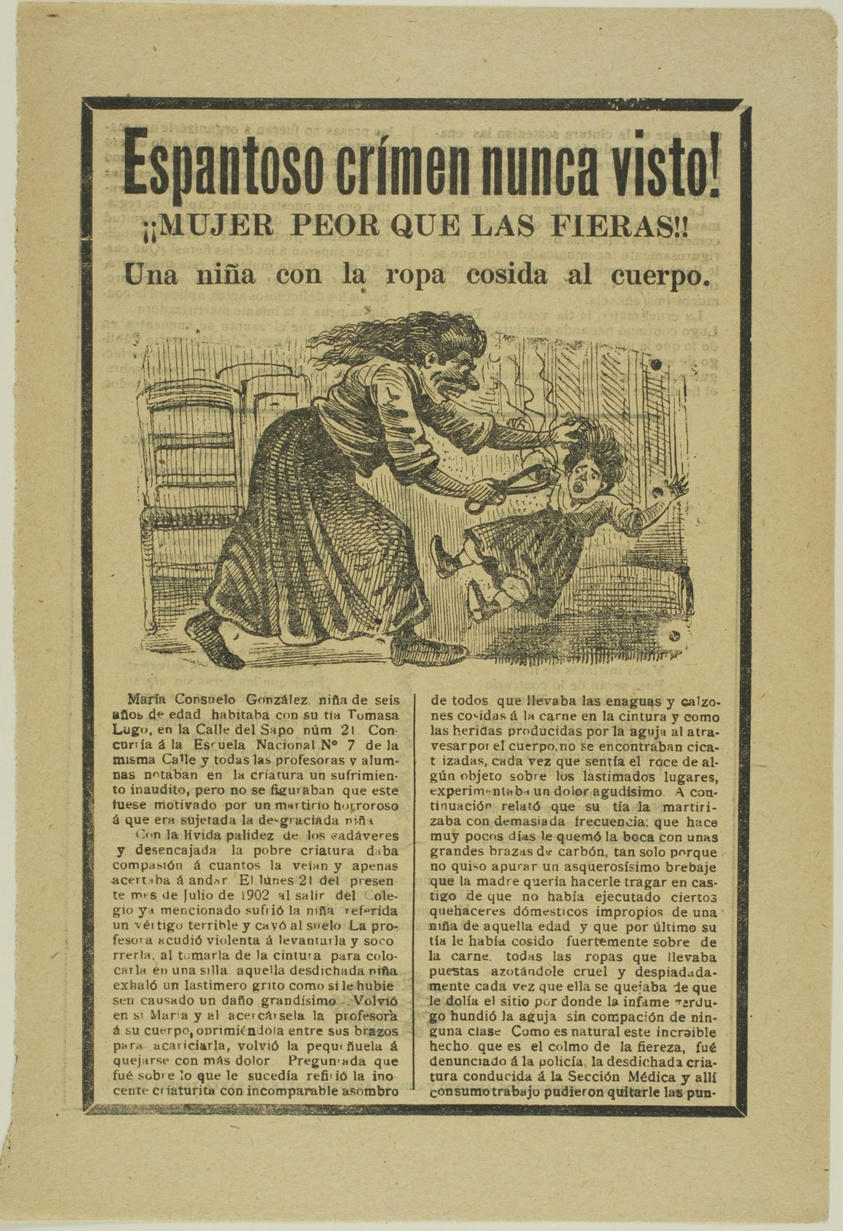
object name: Print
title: Terrible Crime Never Before Seen! Woman worse than the wild beasts!! A little girl with clothing sewn to her body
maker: José Guadalupe Posada (Mexican, 1852-1913)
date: 1902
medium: Photo relief etching on tan wove paper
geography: Mexico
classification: lithograph; print; prints and drawing